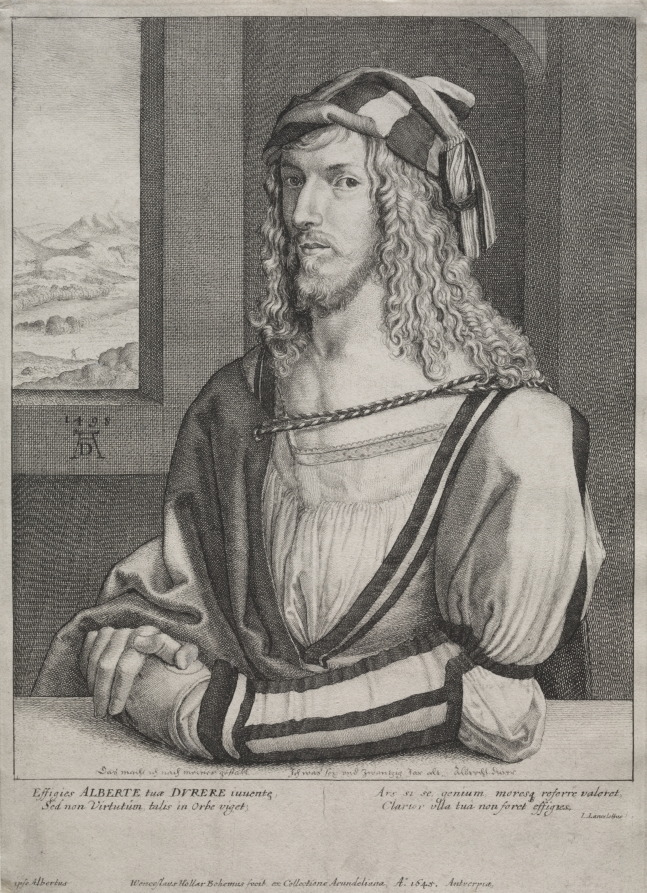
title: Portrait of Albrecht Dürer, at the age of 26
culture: Bohemia, 17th century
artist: Wenceslaus Hollar (Bohemian, 1607–1677)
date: 1645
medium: etching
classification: Print